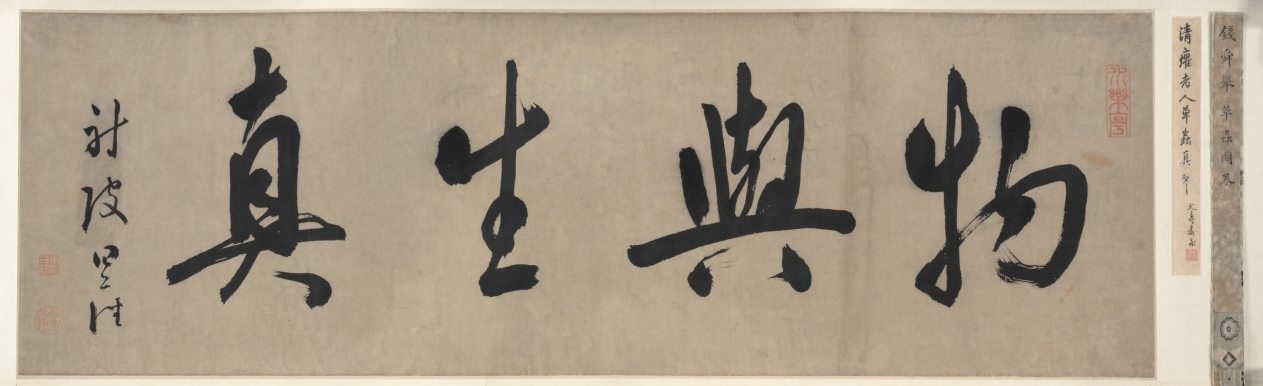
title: Insects and Flowers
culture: China, Qing dynasty (1644-1911) or Republican period (1912-49)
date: c. 1900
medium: Handscroll, ink and color on paper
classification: Painting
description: More than 26 feet long, this scroll presents insects, reptiles, and plants in delicate brushwork and pale colors, referring in style to earlier Southern Song dynasty (1127–1279) bird-and-flower paintings. Upon closer inspection, ants dismember a butterfly and reptiles wait to ambush their prey. An inscription at the end of the painting gives us an idea of its meaning: Attributed to the Qing dynasty scholar Zhang Xigeng (張錫庚, 1801–1861), the inscriber relates the work to an earlier painting by Qian Xuan (錢選, c. 1235–before 1307) and further suggests that the painting may allude to the relentlessness of natural selection. By drawing a parallel to tumultuous episodes in Chinese history, the writer might even hint at the domestic rebellions and the aggression of Western powers against China in his lifetime, particularly the Opium Wars (1839–60).